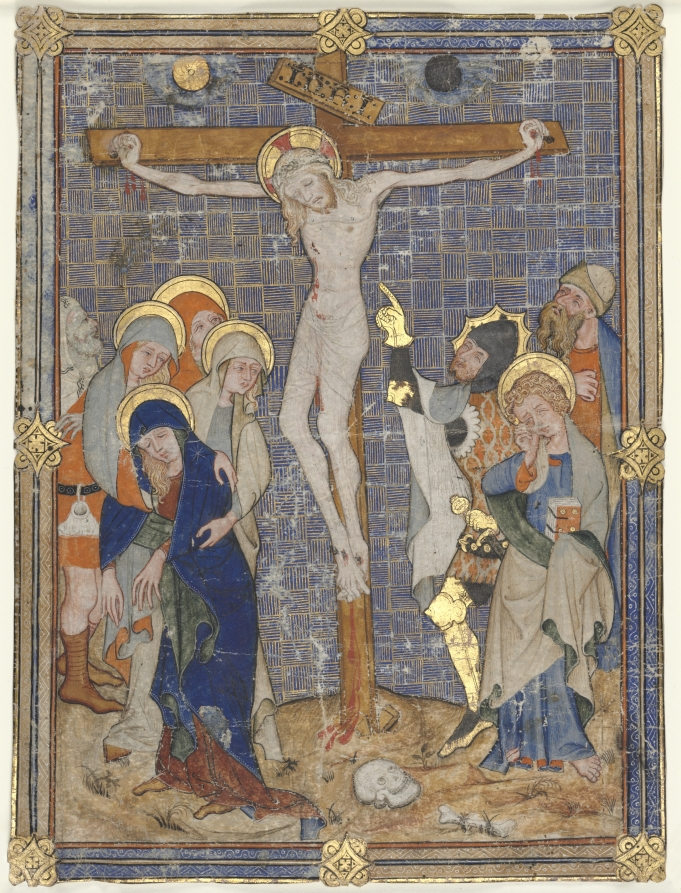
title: Single Miniature Excised from a Missal: The Crucifixion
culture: Flanders, Bruges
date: c. 1385–1390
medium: ink, tempera, and gold on parchment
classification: Manuscript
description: This miniature of the Crucifixion once formed the introductory illustration to the Canon of the Mass in a liturgical missal. The miniature’s style and compositional details compare with the work of various immigrant Netherlandish painters active in France during this same period. The Netherlands was rich in artistic talent, and the willingness with which immigrant artists were accepted in France is demonstrated by an entire generation of Franco-Flemish artists. Elements in the miniature-such as the grouping of the holy women on Christ’s right who support the grieving Virgin, and the treatment of Christ on the cross-are similar to Jean de Beaumetz, court painter to Philip the Good, duke of Burgundy (1364-1404).